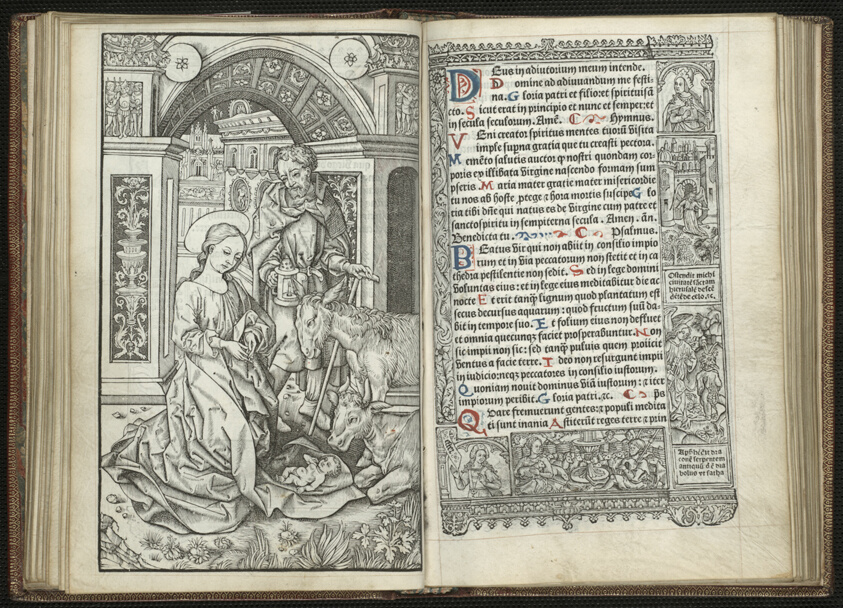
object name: Book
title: Book of Hours, Use of Paris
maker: Simon Vostre (French, flourished 1486-1518)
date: 1508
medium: Woodcut and letterpress in black with brush and gouache, and pen and ink on vellum (discolored at edges), in eighteenth-century full red goatskin, sewn on raised bands, with Cambridge-style gold tooling, rolled edges in gold, gold stamped spine decoration, hand-sewn silk headbands, and marbled endsheets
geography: France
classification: book; prints and drawing